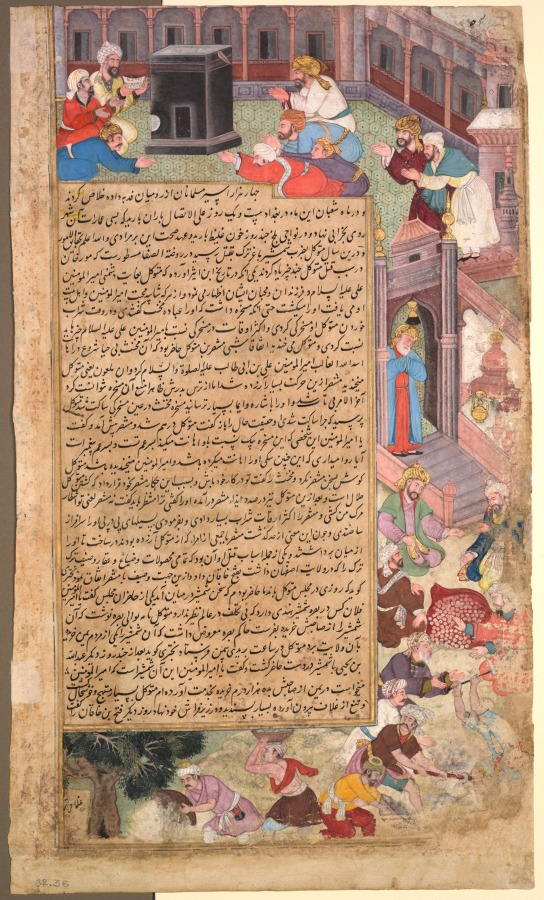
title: Page of disasters, from the Tarikh-i Alfi (History of a Thousand Years)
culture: India, Mughal school, 16th century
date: c. 1595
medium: Gum tempera, ink, and gold on paper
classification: Painting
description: A distinctive feature of this manuscript is the descriptive painting surrounding the blocks of text. At the top of this page is a depiction of the sacred center of Islam, the black stone structure called the Ka‘ba in Mecca that the Prophet Muhammad cleansed of pre-Muslim idols. The Ka‘ba is the endpoint of the Islamic pilgrimage that all Muslims are enjoined to make at least once during their lifetime. Remarkably, Akbar’s name appears on the page of the book held by a devotee, where only prayers or Qur'anic passages should be found. During the time of the caliph who persecuted Shi‘ites, Mecca experienced a drought. Fountains of water now were dry, and pilgrims had to buy water that was carried there.